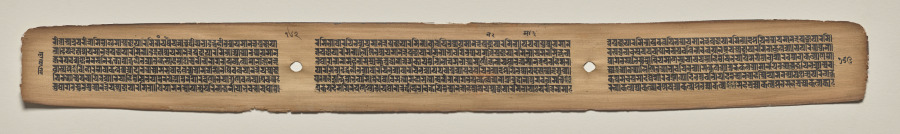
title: Text, folio 162 (verso), from a Manuscript of the Perfection of Wisdom in Eight Thousand Lines (Ashtasahasrika Prajnaparamita-sutra)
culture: Eastern India, Bihar, Vikramashila Monastery. Painting: Nepal, Kathmandu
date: Sunday, September 14, 1119 (year 239 of the Newar Samvat in the month of Ashvina)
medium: gum tempera and ink on palm leaves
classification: Painting